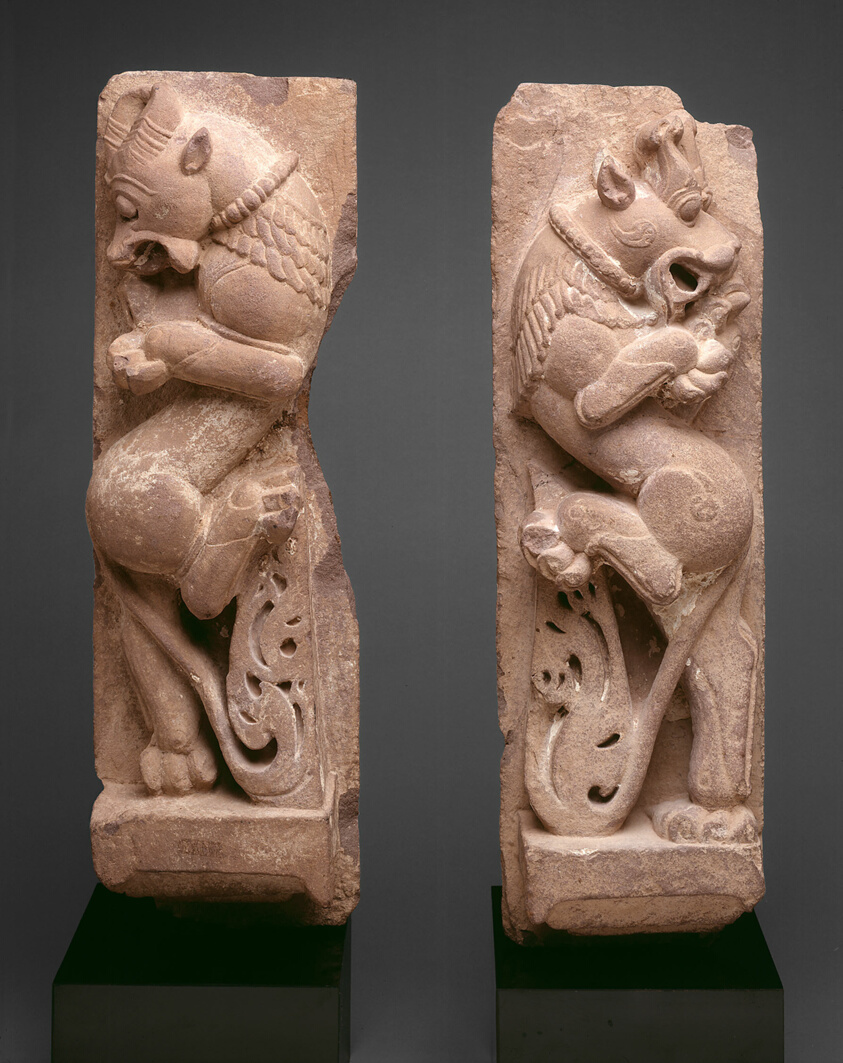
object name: Architectural fragment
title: Rampant Mythical Lions (Vyala)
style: South Asian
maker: India; Madhya Pradesh or Rajasthan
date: 8th/9th century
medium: Sandstone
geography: India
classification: sandstone; stone; sculpture; asian art; architectural fragment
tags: animals